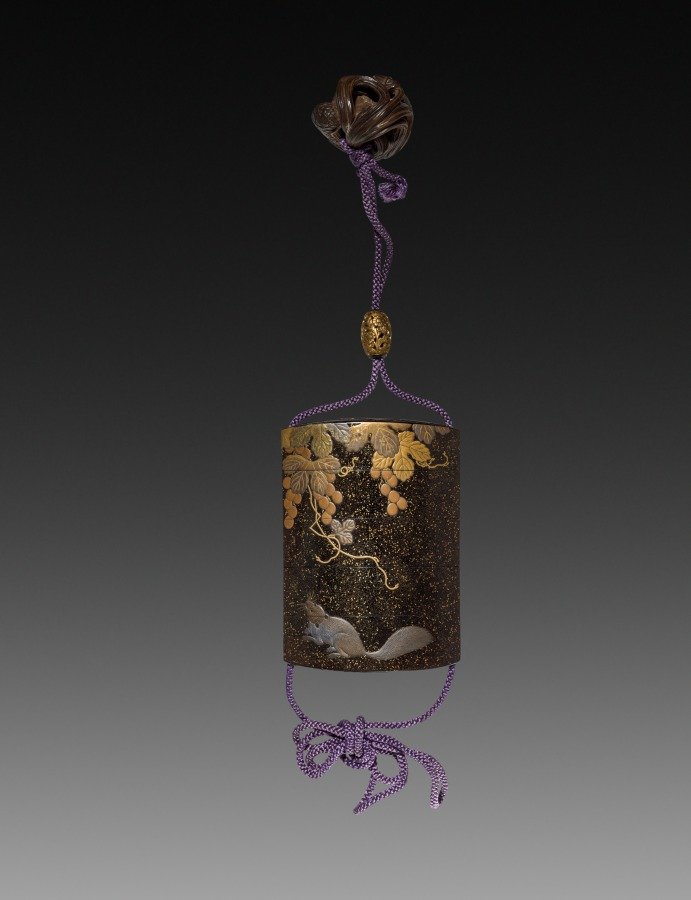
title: Inro (Case) with Squirrels in Grapevines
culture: Japan, Edo period (1615–1868)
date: 1700–1868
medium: Lacquer on wood with sprinkled gold powder design (maki-e)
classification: Lacquer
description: With multiple small compartments joined with a woven silk cord, inro are small cases that can be worn on one’s obi, the sash fastening a kimono. This one has a metal ojime, or small cinch, with a pierced floral design and a wood netsuke (toggle) carved with an autumnal design of quails in millet. The netsuke can be used both to pull the inro out and to help keep it in the obi. Squirrels in grapevines is a popular autumn motif.